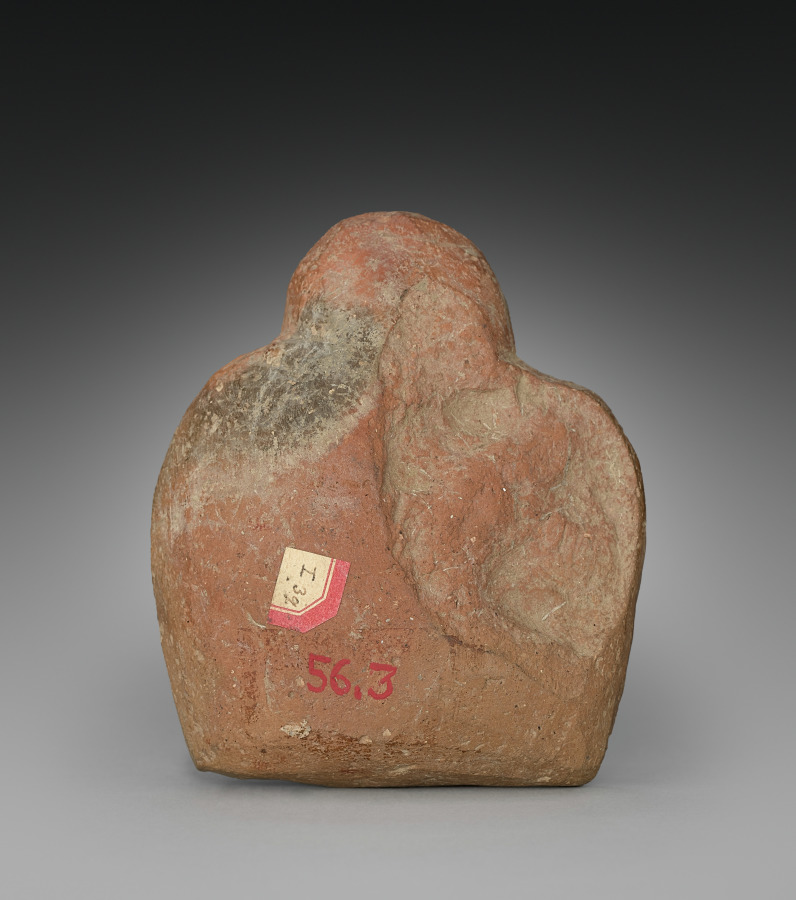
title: Mould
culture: India, Kashmir, 8th-9th Century (?)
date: 700s-800s(?)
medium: terracotta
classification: Ceramic